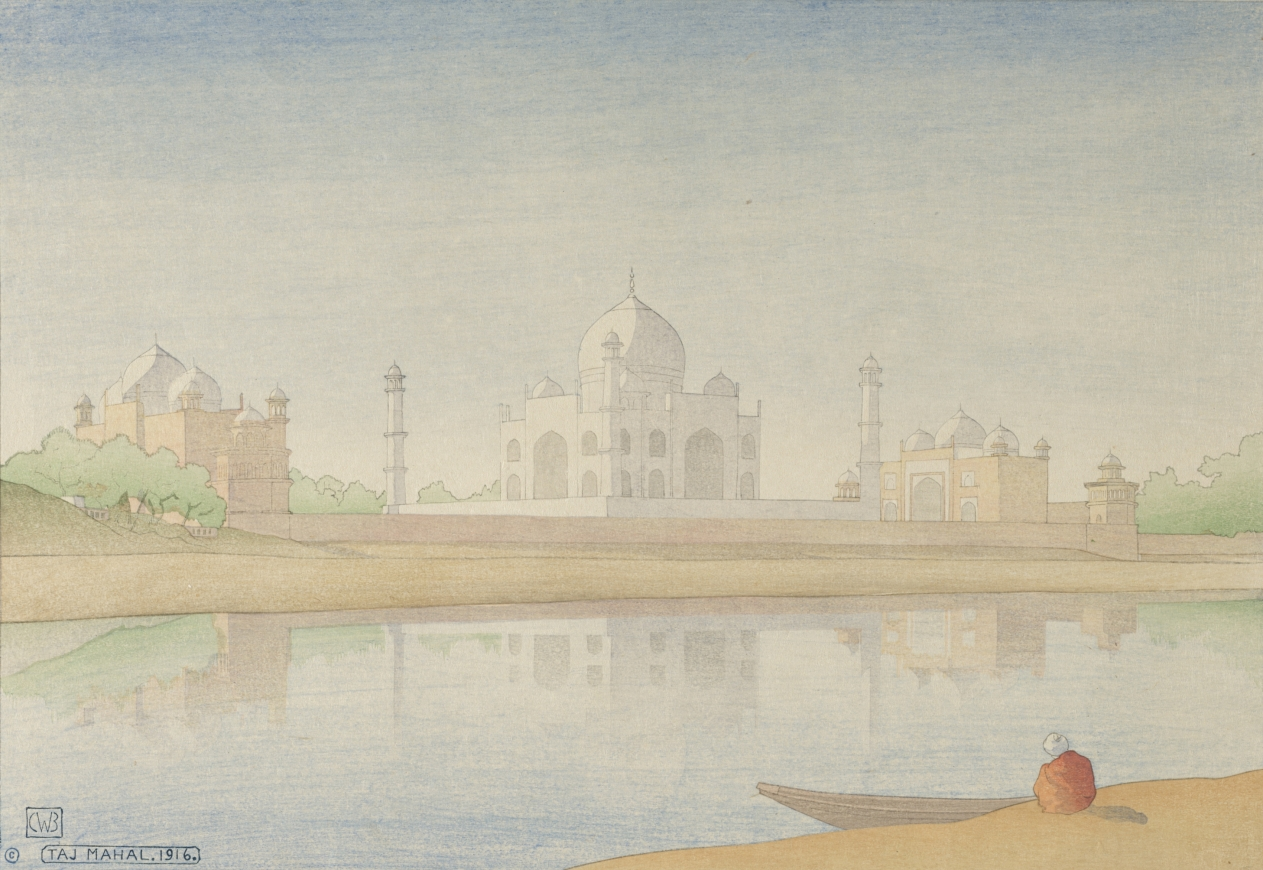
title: Taj Mahal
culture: England, 20th century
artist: Charles William Bartlett (British, 1860–1940)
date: 1916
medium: color woodcut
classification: Print